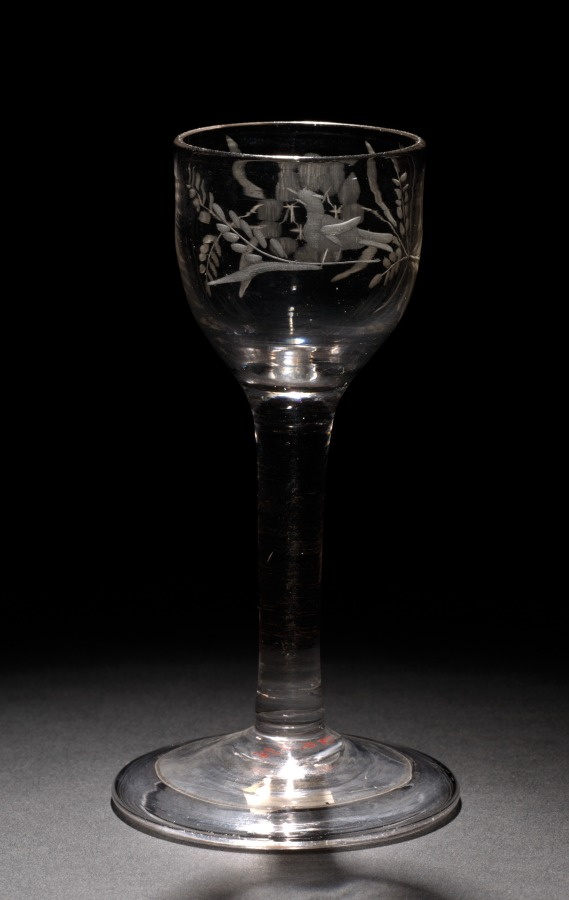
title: Wine Glass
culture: England, 18th century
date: 1750–1799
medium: glass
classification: Glass